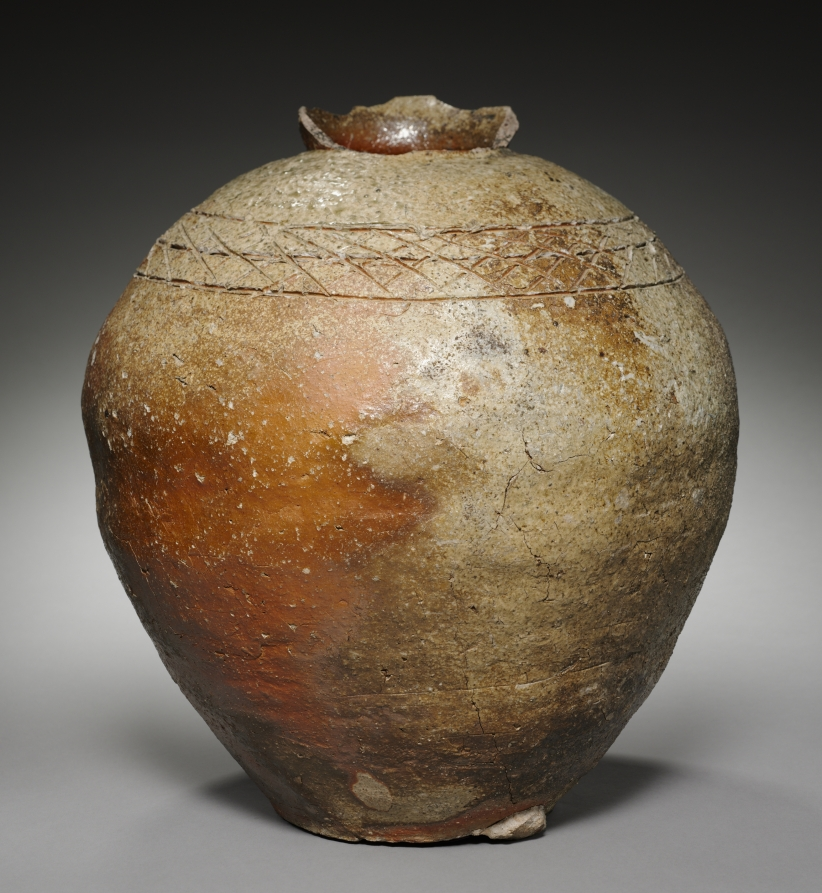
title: Storage Jar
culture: Japan, Muromachi period (1392–1573)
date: late 1300s–1400s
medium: Stoneware with natural ash glaze (Shigaraki ware)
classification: Ceramic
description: The red color of this jar comes from iron in the clay. Natural ash glaze settled on the vessel during firing. The rim would have been complete with a slightly flared lip. Around the collar is an incised pattern resembling cypress fences, a common scene in the Japanese landscape. Intended for grain storage, rustic vessels like this one were also prized by tea enthusiasts, who appreciated the uncalculated beauty of the glaze and the asymmetry of these humble vessels.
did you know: This jar was probably made using a coiling method, where coils of clay are stacked atop each other and smoothed to form its structure.